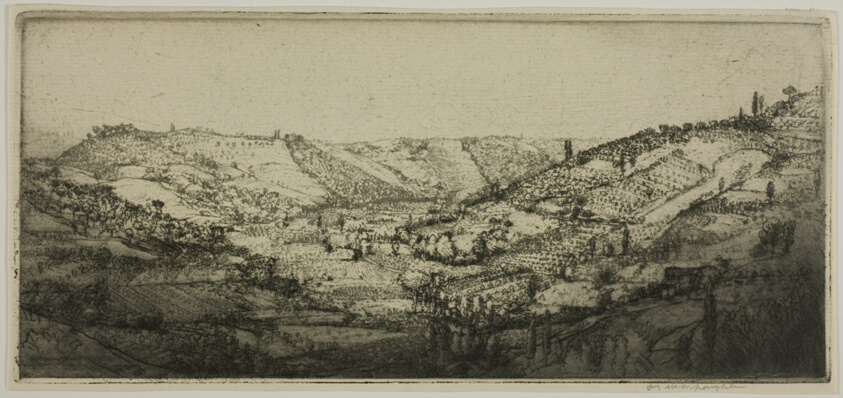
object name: Print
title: Val d'Ema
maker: Donald Shaw MacLaughlan (American, born Canada, 1876-1938)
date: 1909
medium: Etching in black on cream laid paper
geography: United States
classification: etching; print; prints and drawing